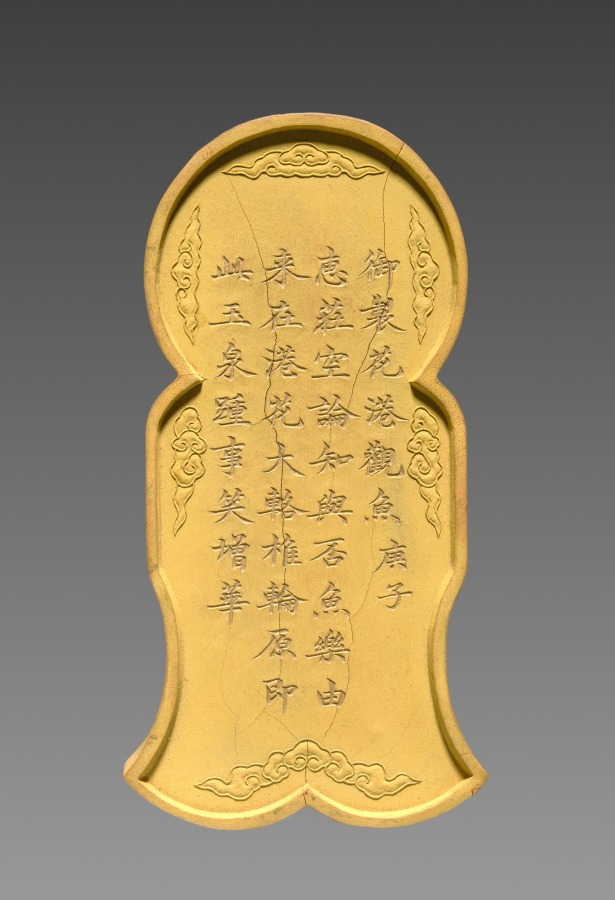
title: Ink Stick from an Imperially Commissioned Set of Ink Stick with Images and Poems of Famous West Lake Sites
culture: China, Qing dynasty (1644–1911), Qianlong reign (1736–95)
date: 1780–94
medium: Molded ink in yellow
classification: Miscellaneous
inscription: 乾隆年製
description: This is one of ten ink cakes of different shapes and colors stored in an exquisite lacquer box. Each is inscribed in gold with a poem by the Qianlong emperor, praising the ten famous sights of the Westlake in Hangzhou, near Shanghai. The Westlake is famous for its natural beauty; it was a favorite imperial destination and remains a tourist attraction today. Ink cakes (also called ink sticks) are dissolved with the addition of water and ground on the surface of a flat stone into liquid ink for painting and calligraphy. The precious ink cakes here, however, have never been used.